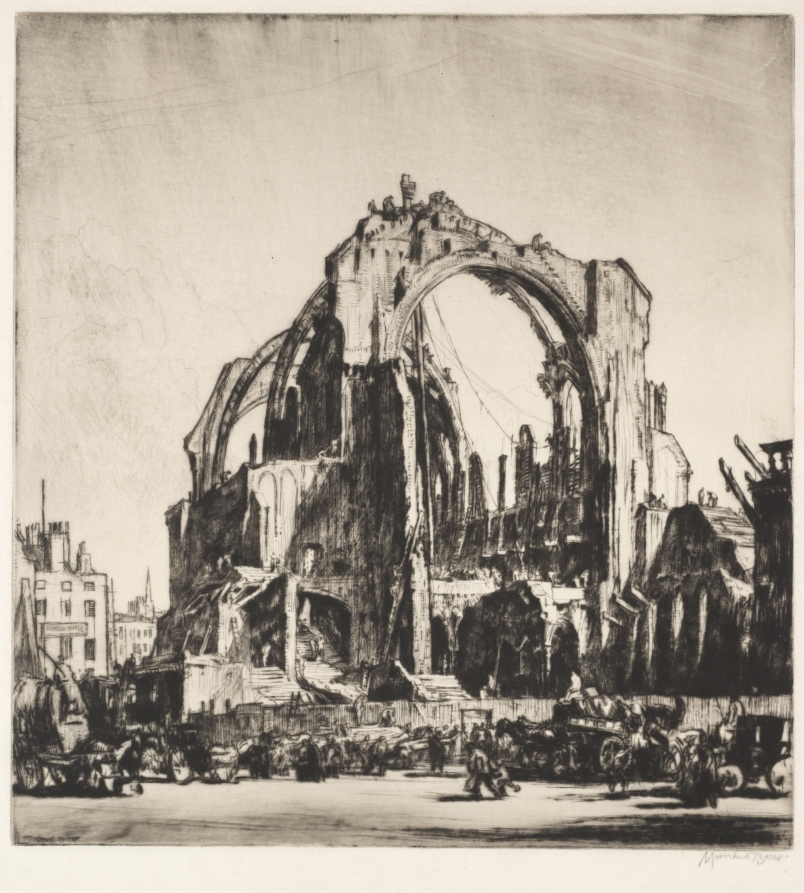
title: Demolition of St. James Hall, Exterior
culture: England, 20th century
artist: Muirhead Bone (British, 1876–1953)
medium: drypoint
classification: Print